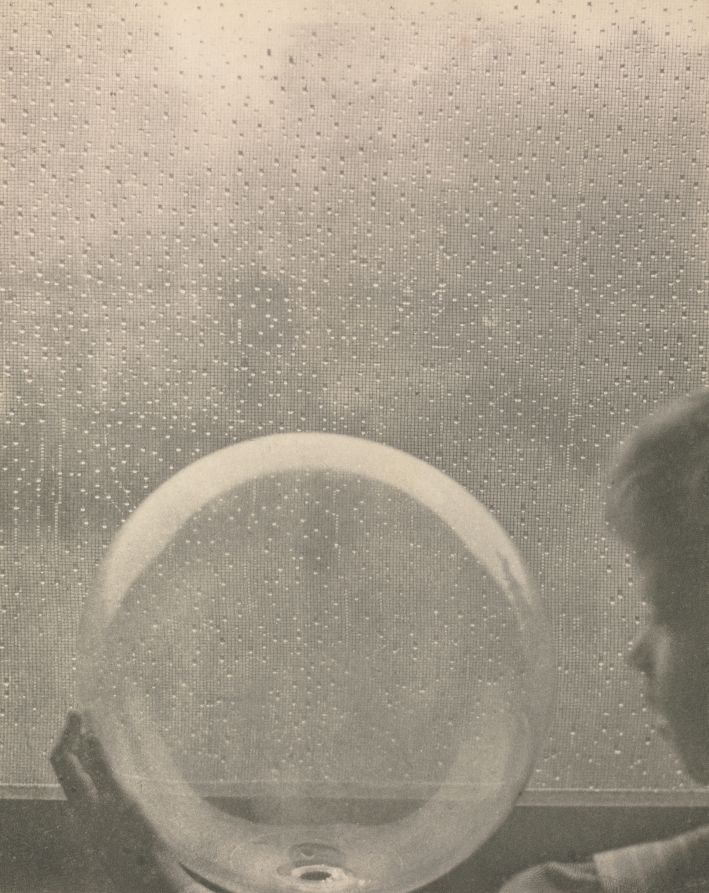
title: Camera Work: Drops of Rain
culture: America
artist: Clarence H. White (American, 1871–1925)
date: 1908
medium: photogravure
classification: Bound Volume